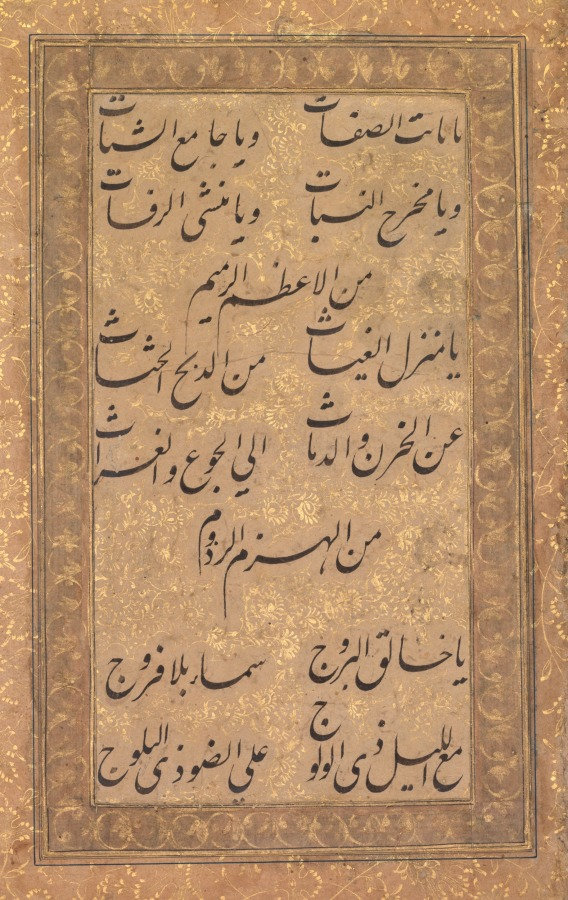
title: Calligraphy of a Pious Invocation in Rhyme (verso)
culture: India, Mughal, 16th century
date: 1500s or 1600s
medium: Gum tempera, ink, and gold on paper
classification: Painting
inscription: Arabic verses in nasta‘liq script: O Immutable in Your attributes!/ O Gatherer of that which is dispersed!/ You who make plants bloom;/ You who quicken the dead from decayed bones;/ You who send down succor/ From those bowing and kneeling/ To the grieving and sick/ To the hungry and famished/ From the routing and flooding,/ O Creator of the constellations,/ In the seamless heavens/ From the onset of night/ To the brightening of the light of dawn.